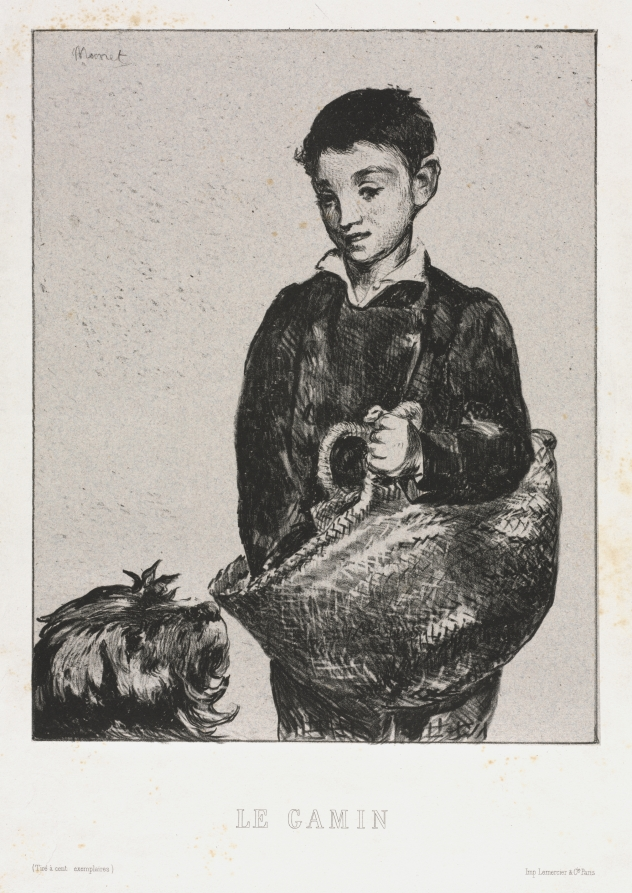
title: The Urchin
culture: France, 19th century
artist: Édouard Manet (French, 1832–1883)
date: 1862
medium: lithograph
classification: Print